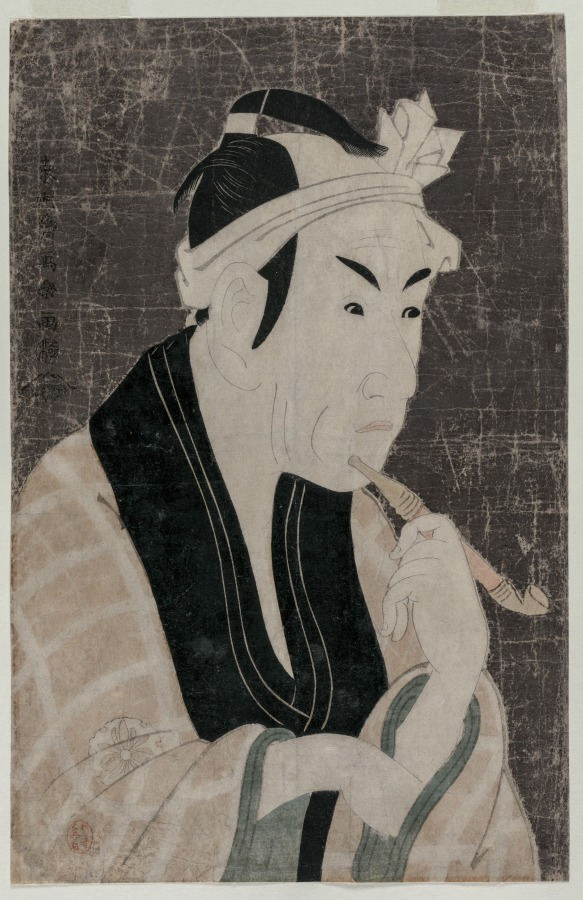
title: Matsumoto Koshiro IV as Gorobei, the Fish Seller from Sanya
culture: Japan, Edo period (1615–1868)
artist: Tōshūsai Sharaku (Japanese, active 1794–95)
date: 1794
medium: color woodblock print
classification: Print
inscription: Signature: Toshusai Sharaku ga Publisher: Tsutaya Juzaburo (emblem) Censorship Seal: kiwame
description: Sharaku portrayed the actor Matsumoto Koshiro IV in his role as the fish merchant Gorobei in the play A Medley of Tales of Revenge, performed at the Kiri Theater in June 1794. The actor specialized in the wagoto, or "gentle style," of acting. In the play, the fish merchant, whose business is located near the Yoshiwara, helps two courtesan sisters avenge their father’s murder. Sharaku created portraits for seven actors appearing in this play. During his ten-month career, Sharaku created about 150 designs for prints, including 28 bust portraits. Many of the portraits were printed with a gray mica background, a popular technique banned in 1794, the year Sharaku was active as a print designer. Censorship edicts restricted themes, sizes, and techniques used in the printing industry as an attempt to curtail the luxuries of the merchant class, patrons of prints. Although the lowest class in society, they had become the wealthiest class by the 18th century. In an effort to maintain a hierarchy, governmental edicts often regulated basic aspects of life.